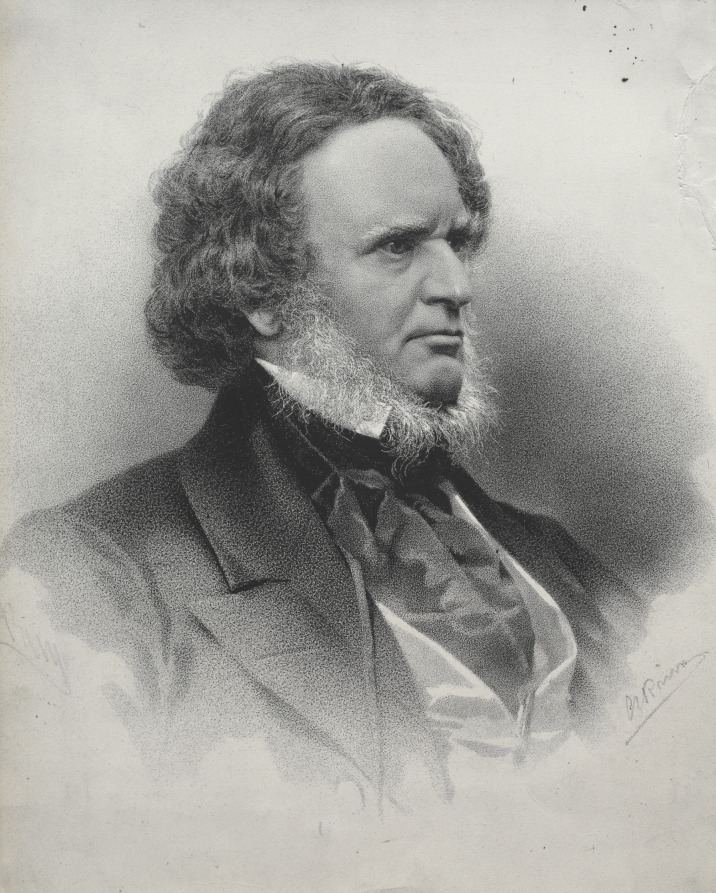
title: Portrait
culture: England, 19th century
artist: Carl Adolph Rimanoczy (British, 1834–1910)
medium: lithograph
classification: Print